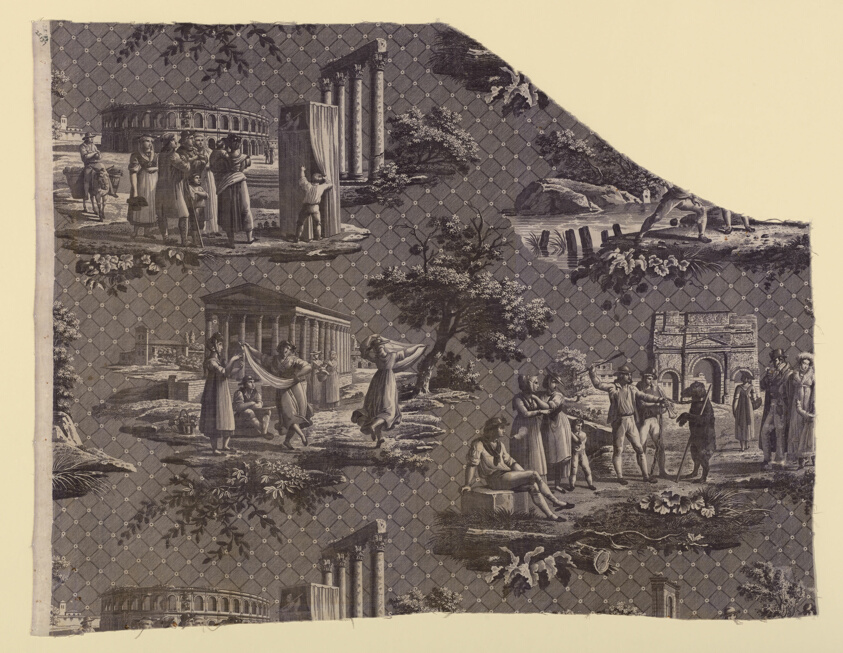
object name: Textile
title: Les Monuments du Midi (Monuments of the South of France) (Furnishing Fabric)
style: jouy-en-Josas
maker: Designed by Hippolyte Lebas (French, 1782–1867) after etchings by Bartolomeo Pinelli (Italian, 1781–1835) and engraved by Nicolas Auguste Leisnier (French, 1787–1835); France, Jouy-en-Josas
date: c.1811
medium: Cotton, plain weave; engraved roller printed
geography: France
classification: textile; weaving - printed; furnishing textile